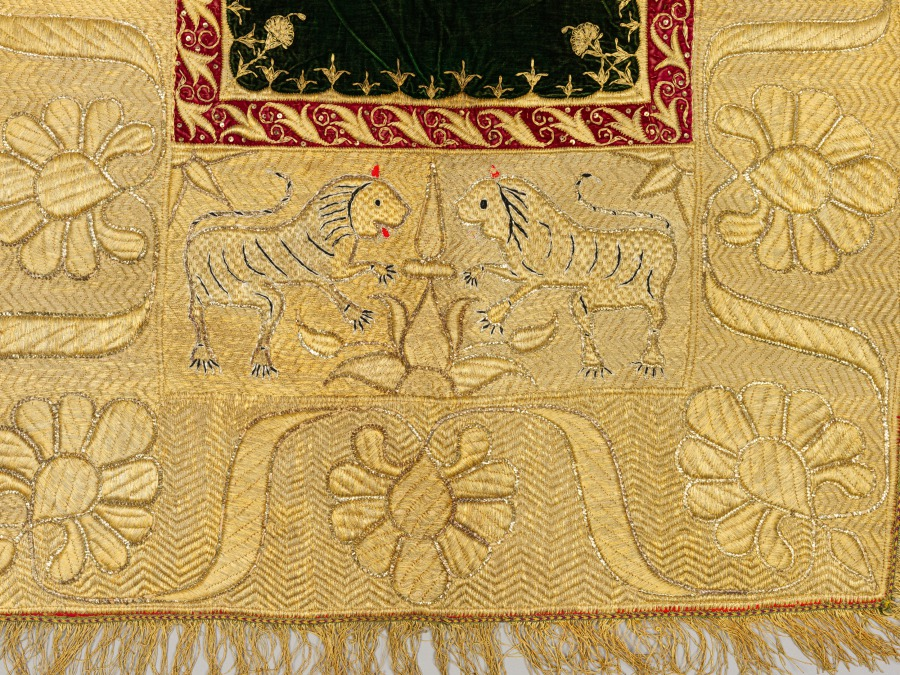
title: Embroidered Cover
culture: India, 19th century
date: 1800s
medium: embroidery: silk, metal, and cotton thread on cotton ground; silk edging and velvet appliqué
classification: Embroidery